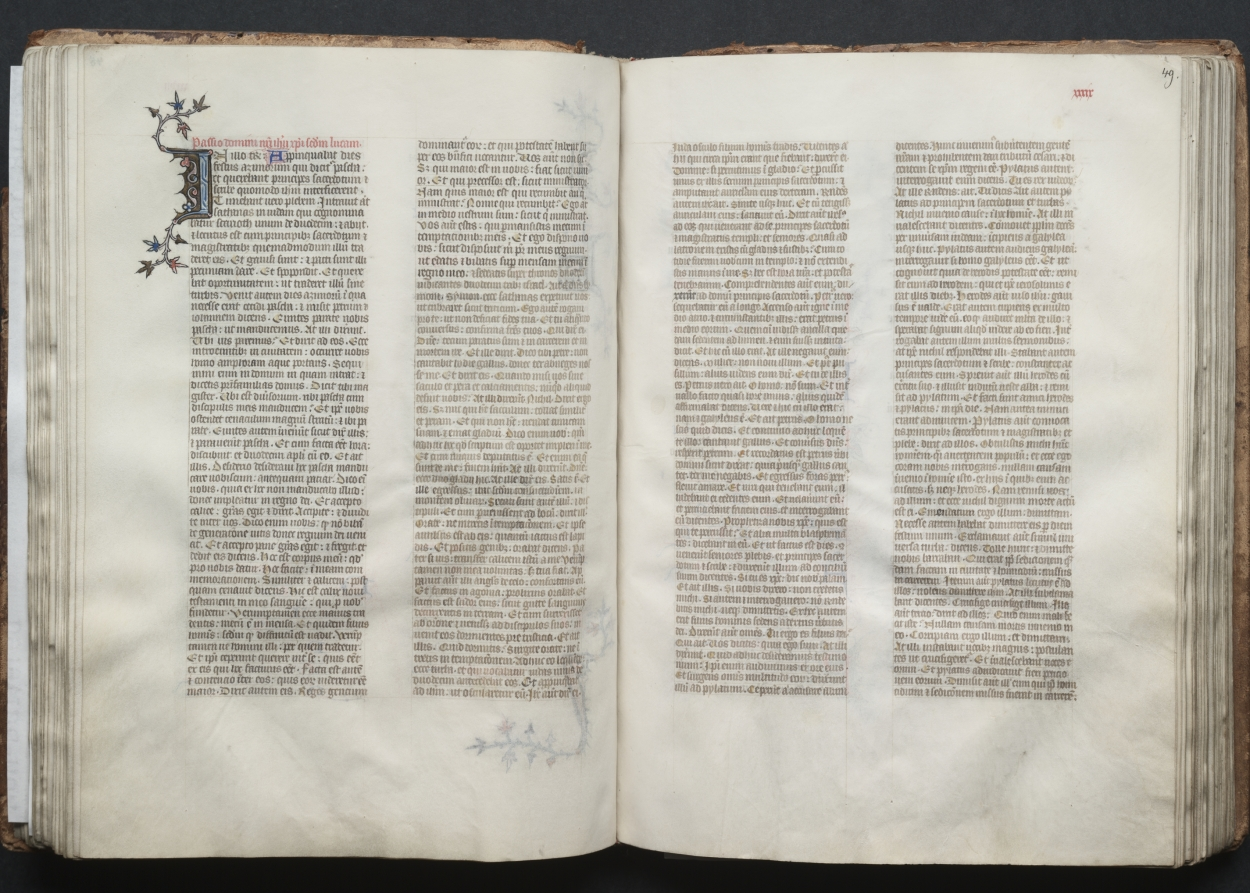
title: The Gotha Missal: Fol. 48v, Text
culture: France, Paris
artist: Master of the Boqueteaux (French)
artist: and Workshop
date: c. 1375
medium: ink, tempera, and gold on vellum; blind-tooled leather binding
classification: Bound Volume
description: The style and quality of this manuscript's decoration is typical of deluxe Parisian books made for aristocratic or royal patrons. Most of the book's decoration appears to be the work of the Master of the Boqueteaux, an artist active at the court of King Charles V (died 1380). His style was apparently shared by a number of book illuminators working in and around Paris. It is very possible that the Gotha Missal belonged to Charles V, but is not provable because the manuscript has no royal portraits and lacks a colophon. Given the book's magnificent decoration, however, it would seem that it was produced for a Valois prince, if not for the king himself. The manuscript receives its name from the German dukes of Gotha, its later owners.